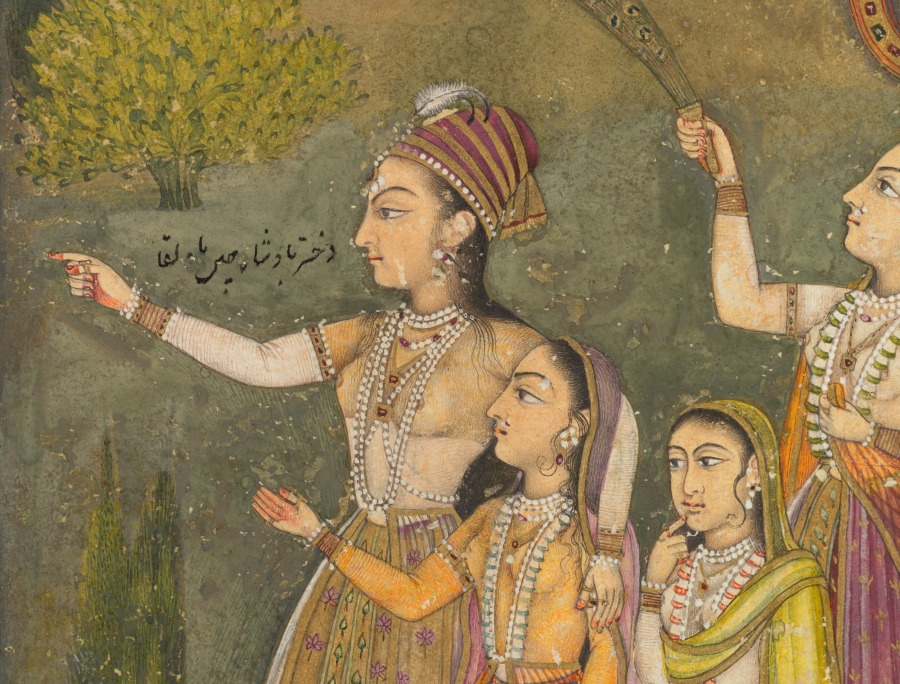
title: Mahliqa, Daughter of the Emperor of China, Pointing at the Bird-Man Khwaja Mubarak: A Leaf from a Poetical Romance Relating to Shah Alam I (recto)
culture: Mughal India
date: c. 1710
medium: Gum tempera and gold on paper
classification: Painting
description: A Persian inscription identifies the bird-man in the tree by name, but the text in which he appears remains unidentified. Also unknown is the Chinese princess Mahliqa (“she who has a face like the moon”), named in a Persian inscription written in front of her face. The artist depicts her in the dress of a Mughal court lady, except for the addition of an unusual headdress, and her handmaidens all look Indian. They gesture to the bird-man from the opposite side of a formal garden canal with fountains. A fortified city lies in the distance behind the walled garden, while creatures peer up at the fabulous composite figure from the water below.